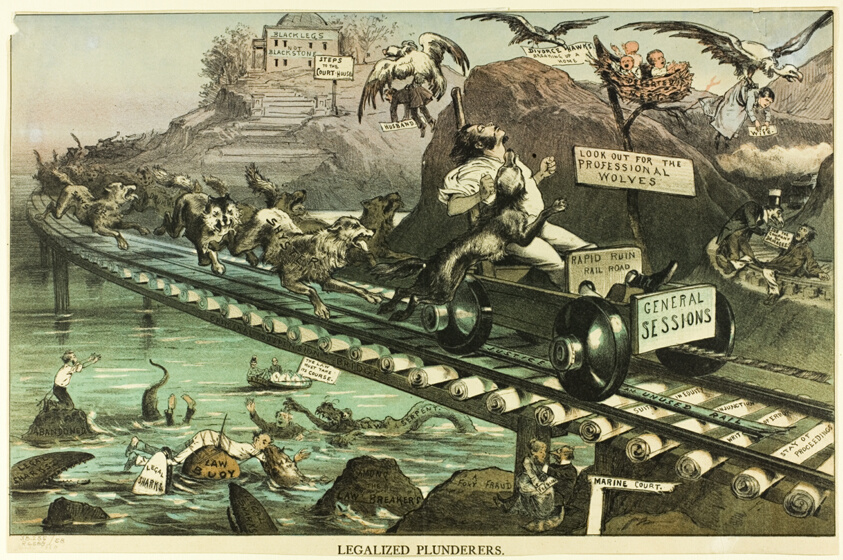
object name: Print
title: Legalized Plunderers, from Puck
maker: Unknown Artist; American, 19th century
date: 1880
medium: Color lithograph on newsprint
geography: United States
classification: lithograph; print; prints and drawing